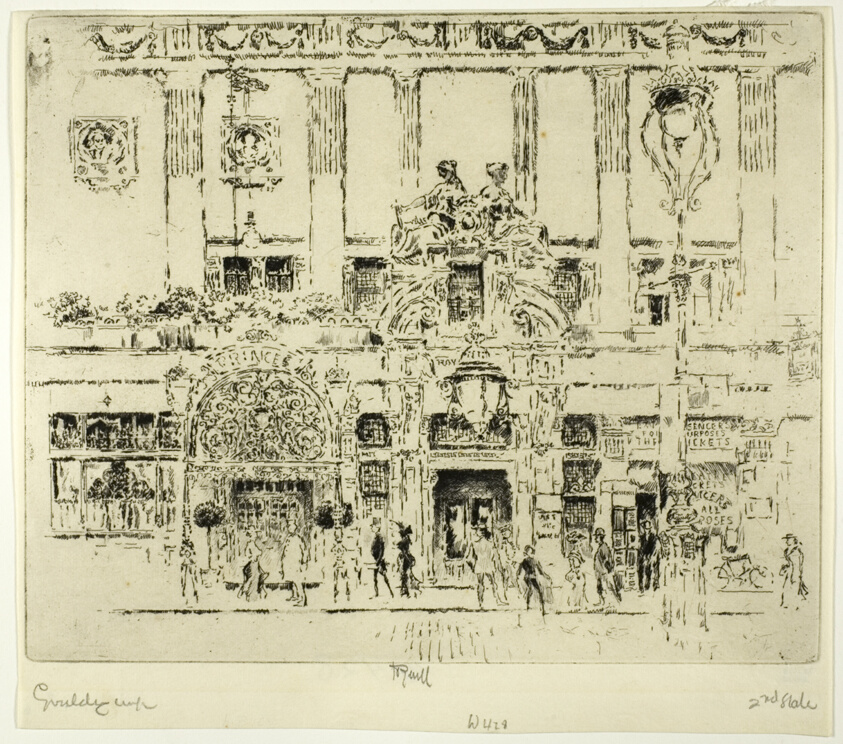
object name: Print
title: The Institute, Piccadilly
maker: Joseph Pennell (American, 1857-1926)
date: 1906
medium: Etching on ivory laid paper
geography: United States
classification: etching; print; prints and drawing